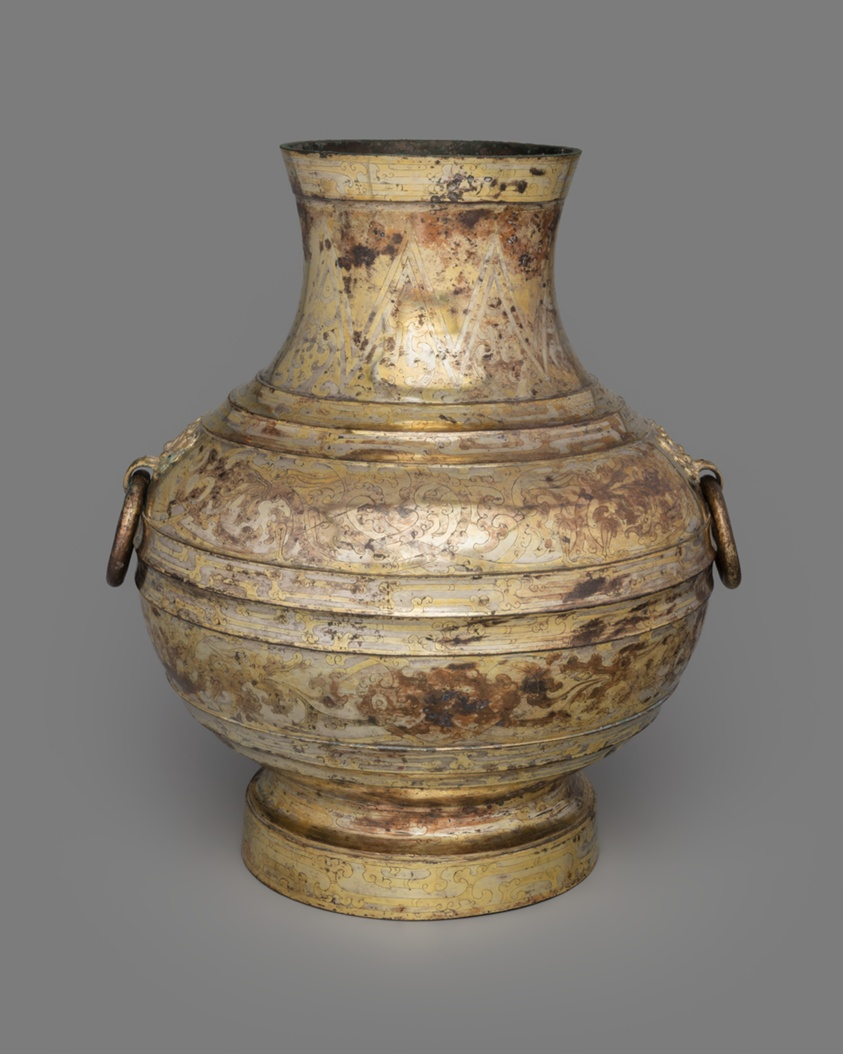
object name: Vessel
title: Jar (hu or zhong)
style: Chinese (culture or style)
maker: China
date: Western Han dynasty (206 B.C.–A.D.9)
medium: Bronze with gilding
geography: China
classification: vessel; bronze; vessel for serving drinks; metal; asian art